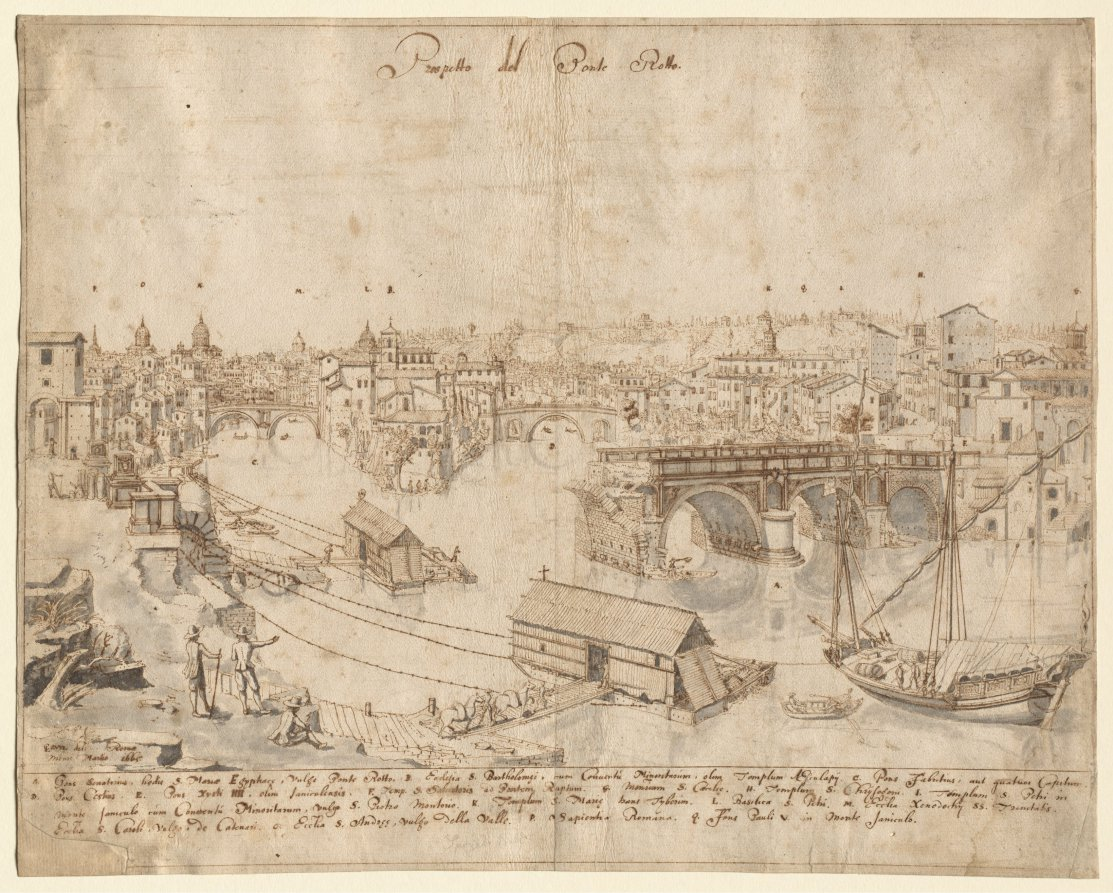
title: Eighteen Views of Rome: The Ponte Rotto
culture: Flanders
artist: Lievin Cruyl (Flemish, c. 1640-c. 1720)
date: 1665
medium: pen and brown ink and brush and gray wash over graphite; framing lines in brown ink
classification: Drawing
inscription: signed, lower left, in brown ink: [artist's monogram: LC] RVYL del: Romæ / mense Martio 1665. ; by artist, upper center, in brown ink: Prospetto del Ponte Rotto. ; by artist, throughout composition, in brown ink: [the letters A-Q] ; by artist, across bottom, in brown ink: A. Pons Senatorius, hodie S. Mariæ Egyptiacae, vulgo Ponte Rotto. B. Ecclesia S. Bartholomaei, cum Conventû Minoritarum, olim Templum Æsculapij. C. Pons Fabritius, aut quatuor Capitum. / D. Pons Cestius. E. Pons Xysti IIII, olim Janiculunsis. F. Temp. S. Salvatoris ad Pontem Rupium. G. Monrium S. Cæciliæ. H. Templum S. Chrijsogoni. I. Templum S. Petri in / Monte Janiculo cum Conventú Minoritarum, vulgo S. Pietro Montorio. K. Templum S. Mariæ trans Tyberim. L. Basilica S. Petri. M. Ecclia Xenodochij SS. Trinitatis. / [N.] Ecclia S. Caroli, vulgo, de Catenari. O. Ecclia S. Andreæ, vulgo della Valle. P. Sapientia Romana. Q. Fons Pauli V. in Monte Janiculo. ; lower center, in graphite: Spiegel Bild ; VERSO, upper left, in brown ink: [illegible] [partially masked] ; ON STRIPS OF PAPER MOUNTED TO VERSO, lower center, in graphite: A20986 ; lower right, in graphite: E. 15